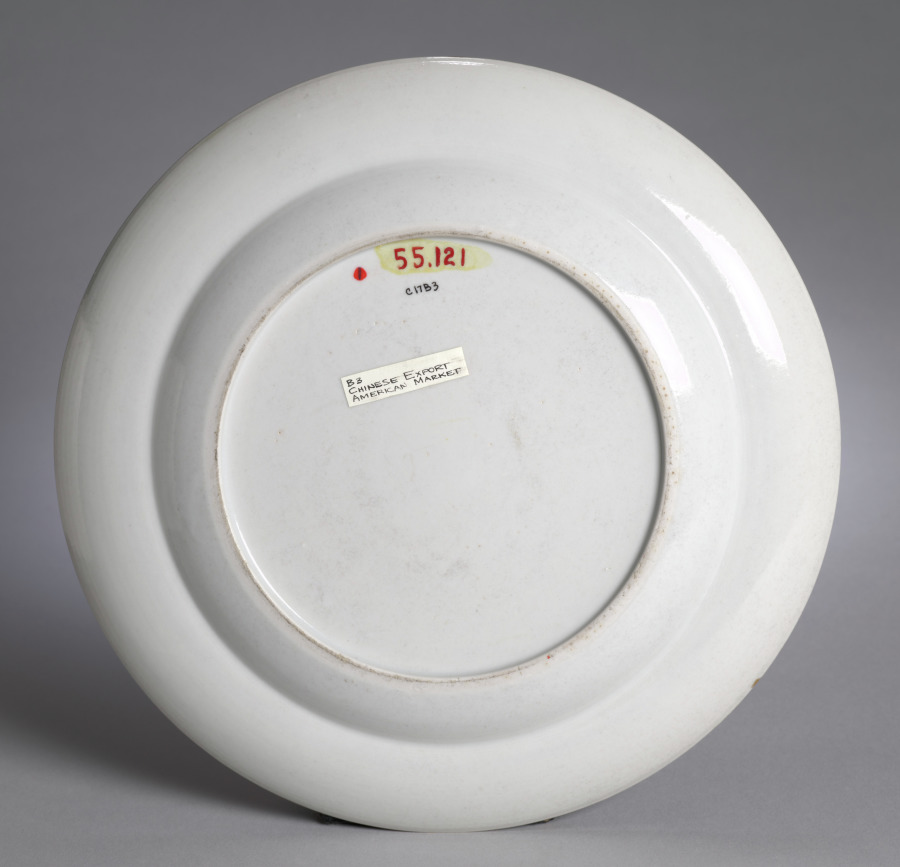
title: Dinner Plate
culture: China, Chinese Export, 18th century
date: 1785–1800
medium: porcelain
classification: Ceramic